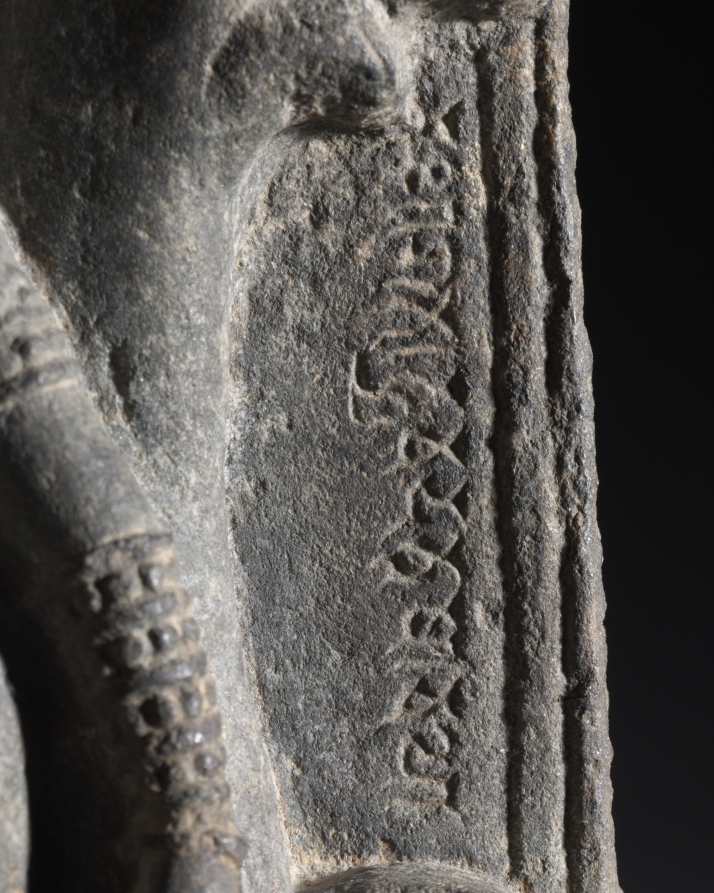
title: Birth of the Buddha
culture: Northeastern India, Bengal, Pala dynasty (730-1197)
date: 800s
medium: Black chlorite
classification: Sculpture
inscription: Phenomena arise from causes;/ The causes have been revealed by the Buddha,/ As have the means for their cessation;/ Thus has been declared by the Great Ascetic.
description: The historical Buddha known as Shakyamuni was born Prince Siddhartha around the end of the 400s BCE near the border of what is today India and Nepal. His mother, Queen Maya, was traveling from her husband’s capital to her family home to give birth, but the baby came early and was born in a grove of shala trees. The miraculous circumstances of his birth are related in a number of textual sources. They state that he emerged from her right side, so Queen Maya here is shown grasping the branch of a tree with her right hand raised, like a nature divinity. The baby was received by Indra, king of the gods, and immediately he took seven steps. The figure at the lower right is Brahma, the Hindu god of creation. In works of Buddhist art, Hindu gods appear as subservient or inferior to the Buddha. The Sanskrit inscription records a common Buddhist prayer of this period: Phenomena arise from causes; The causes have been revealed by the Buddha, As have the means for their cessation; Thus has been declared by the Great Ascetic.